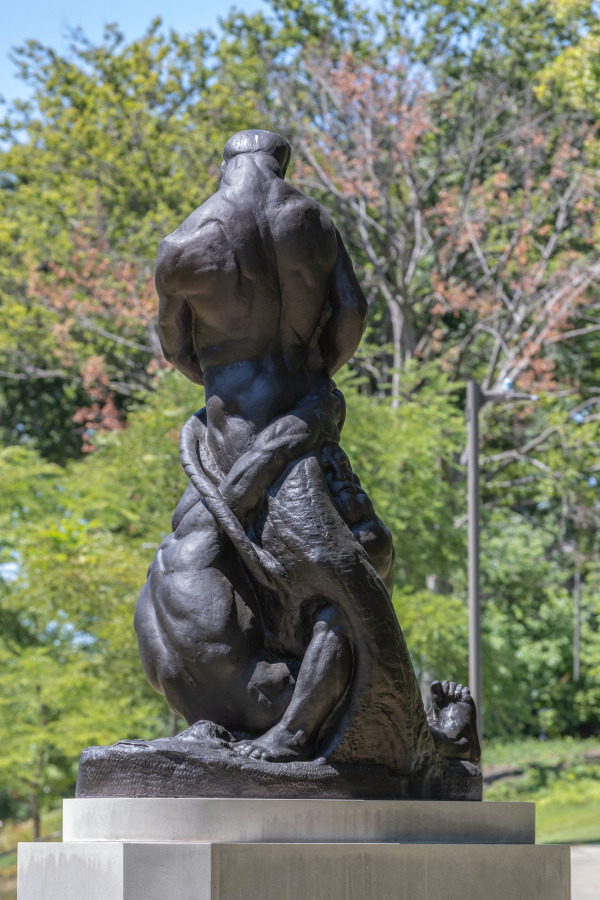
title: The City Fettering Nature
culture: America, Ohio, Cleveland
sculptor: Alexander Blazys (American, born Russian Empire [now Lithuania], 1894–1963)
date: 1927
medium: bronze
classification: Sculpture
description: Alexander Blazys, a Lithuanian immigrant, became a leading sculptor in Cleveland during the 1920s, when he created The City Fettering Nature for the Cleveland Museum of Art’s grounds. In this composition, Utility and Beauty, two characteristics of the city, are shown as intertwined figures attempting to subdue Nature’s power. The brawny figure of Nature, still standing despite this attack, struggles to free himself from the restraints.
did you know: This monumental bronze sculpture weighs 1,500 pounds and requires a crane to install.